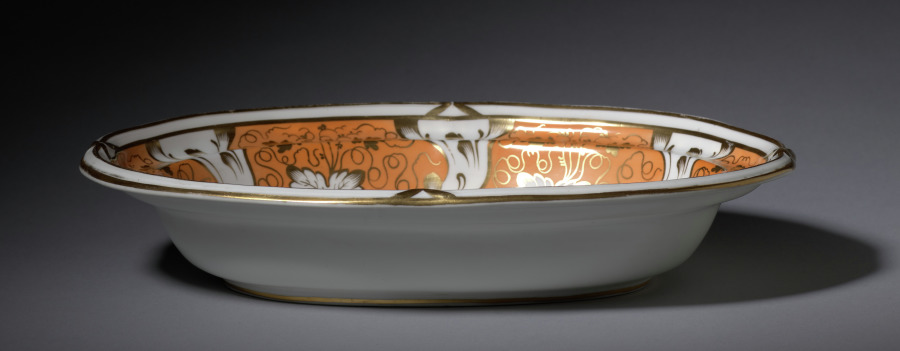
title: Vegetable Dish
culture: England, Staffordshire, early 19th century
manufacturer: Davenport Pottery and Porcelain Factory (British)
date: early 1800s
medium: ceramic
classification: Ceramic